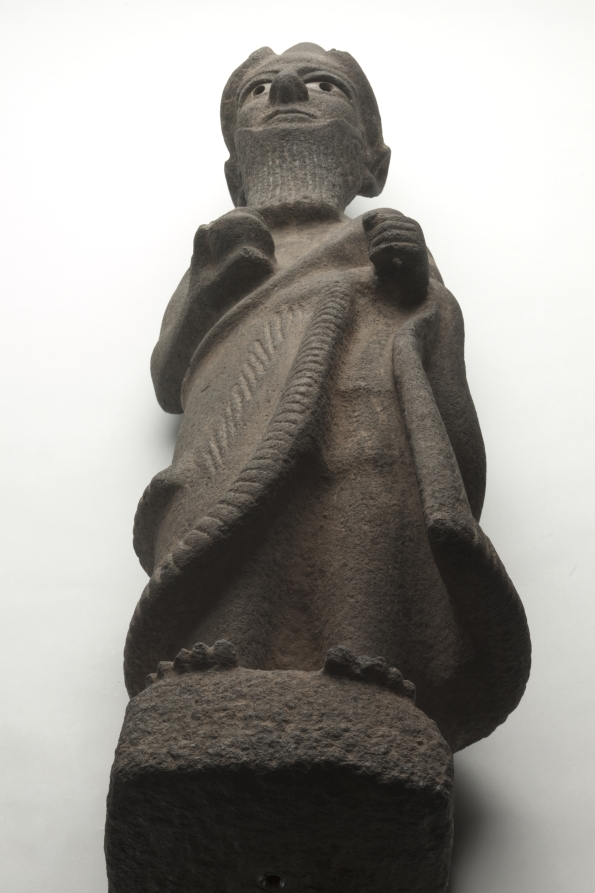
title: Priest-King or Deity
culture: Hittite, North Syria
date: c. 1600 BCE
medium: basalt with bone eyes (left, ancient; right, restored)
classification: Sculpture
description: The Hittites migrated into Anatolia in the 3rd millennium BCE and spoke an Indo-European language, a group that includes Greek, Latin, Persian, Sanskrit, English, and most modern European languages. They were the first ancient people to use iron for weapons. From about 1600–1200 BCE their empire was at its peak, extending from central Anatolia to Syria, and south along the eastern Mediterranean. Their vast empire and interest in commerce enabled the Hittites to spread Mesopotamian ideas and culture throughout the ancient Mediterranean world. This large basalt sculpture is exceptionally rare in depicting a Hittite god or priest-king wearing a horned conical crown, false beard, and long robe. He holds a bowl in his right hand and once held something in his left, perhaps a staff or sword.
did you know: The left eye of the sculpture is the original bone inlay while the right eye is a modern restoration done after the piece was damaged.